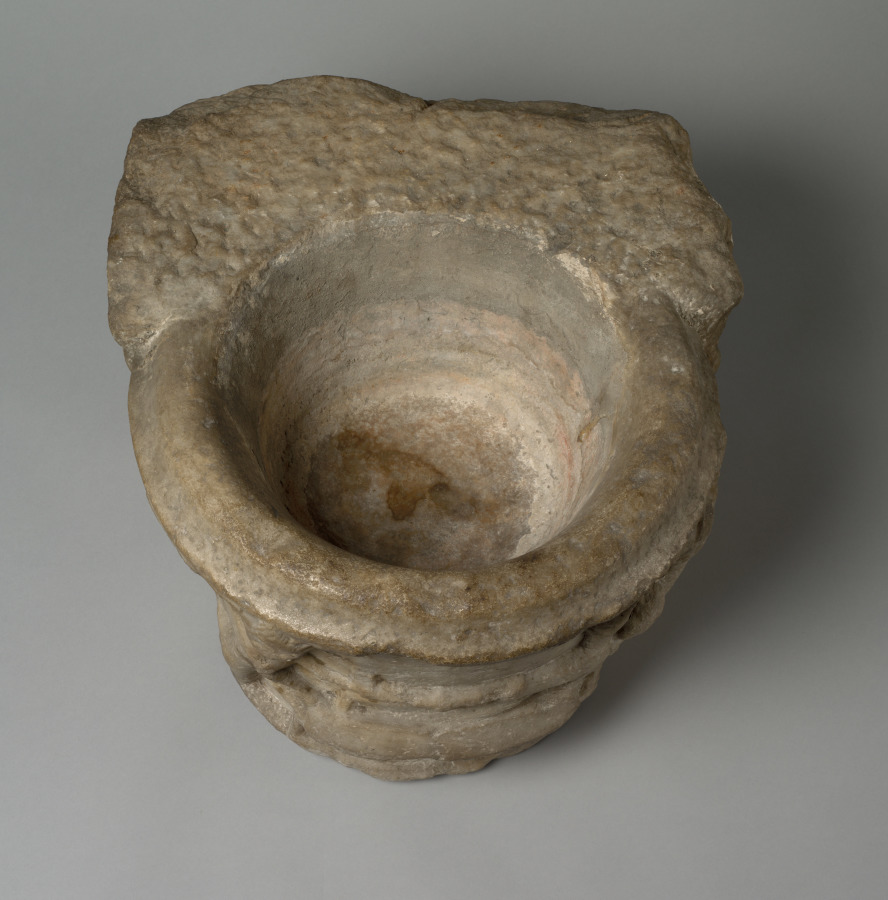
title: Holy Water Font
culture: Southern France, late 15th century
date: late 1400s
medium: marble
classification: Sculpture